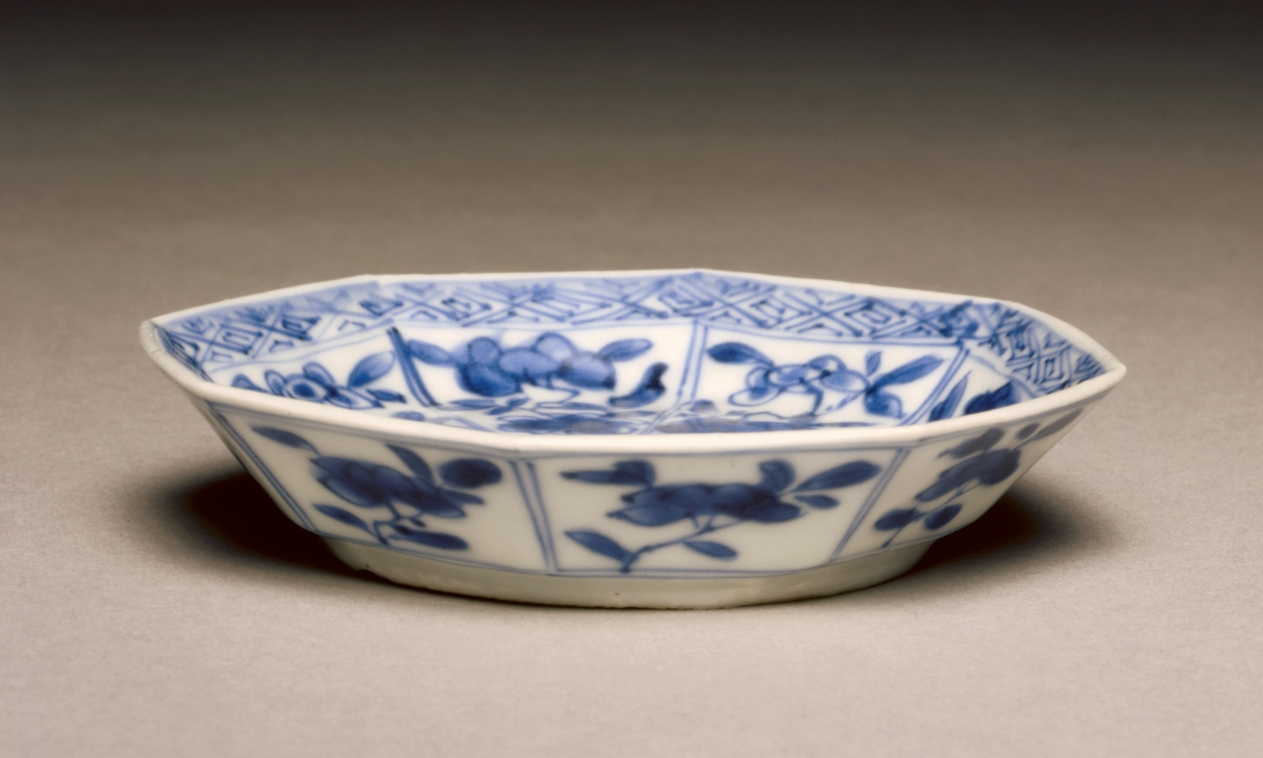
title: Saucer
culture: China, Qing dynasty (1644-1911)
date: c. 1690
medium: porcelain with blue and white decoration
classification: Ceramic